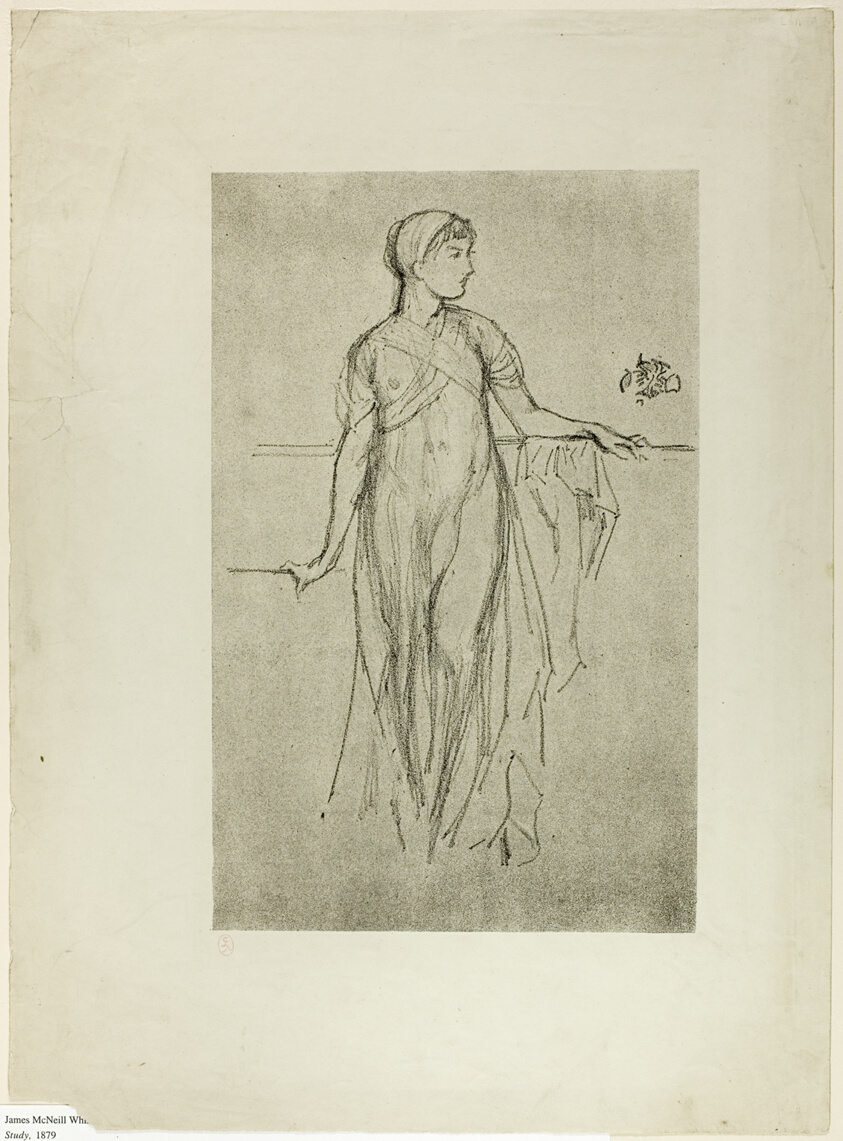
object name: Print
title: Study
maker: James McNeill Whistler (American, 1834-1903)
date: 1879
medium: Lithograph from a prepared half-tint ground, in black ink, with scraping, on grayish ivory wove proofing paper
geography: United States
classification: lithograph; print; prints and drawing; paper